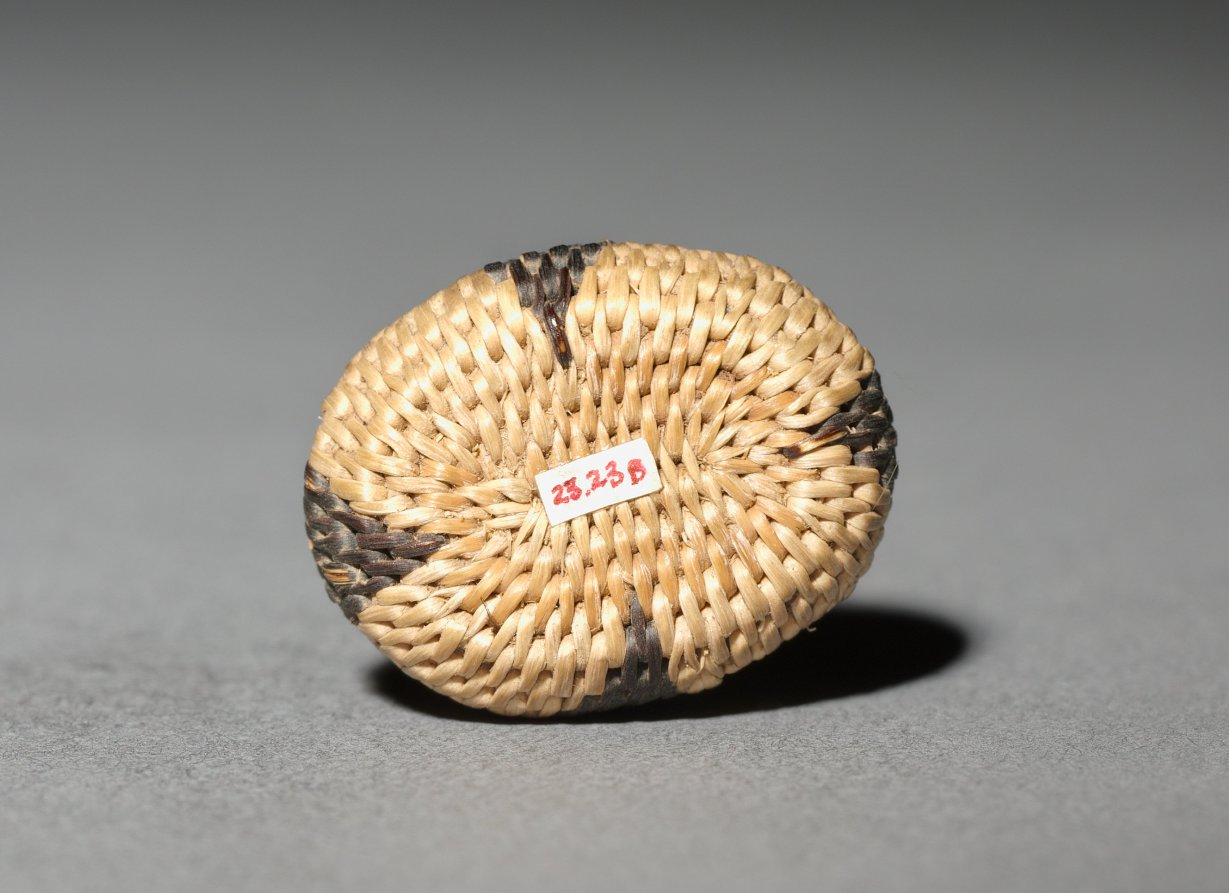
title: Miniature Basket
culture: America, Native North American, Southwest, Arizona, Akimel O'odham (Pima), Unassigned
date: before 1923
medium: plant fiber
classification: Basketry